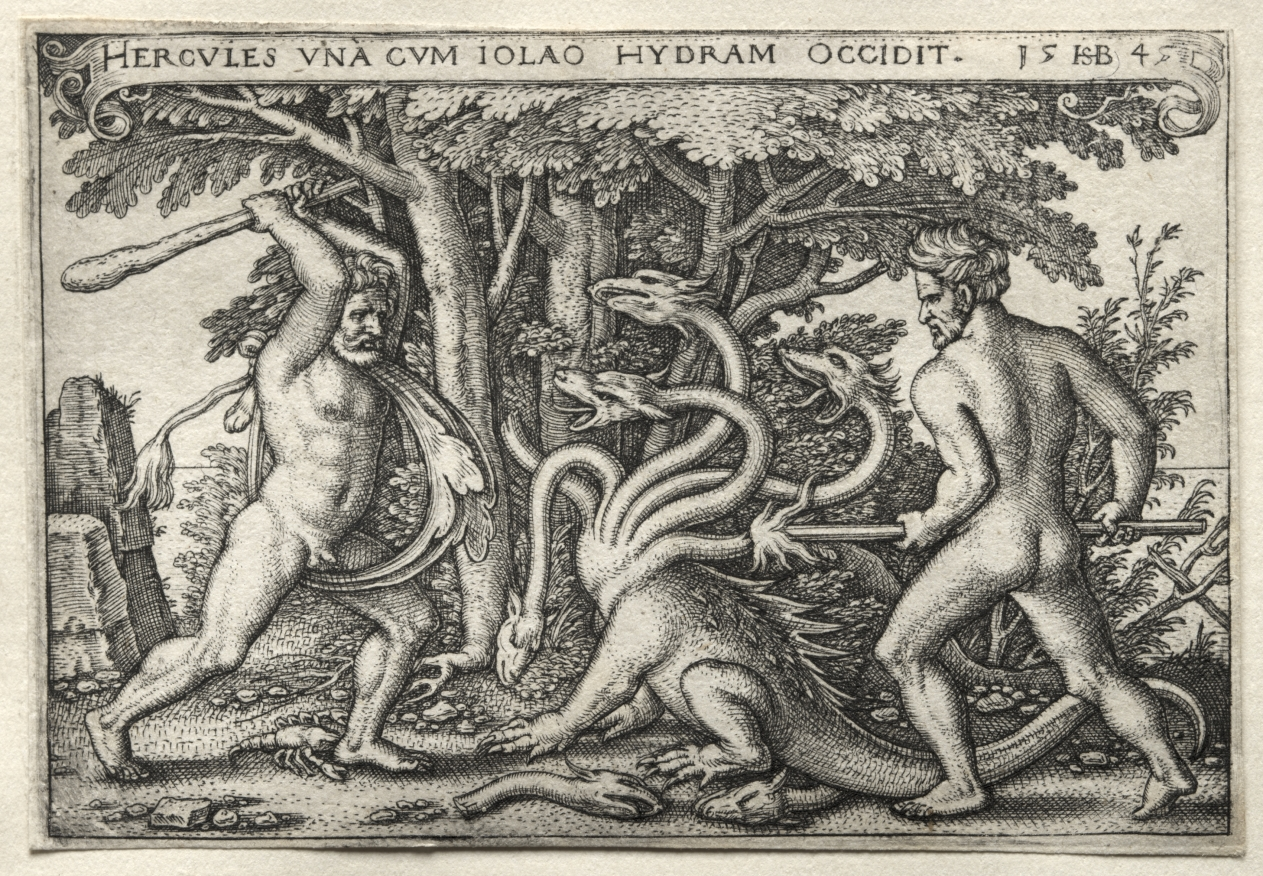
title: The Labors of Hercules: Hercules Killing the Lernean Hydra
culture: Germany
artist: Hans Sebald Beham (German, 1500–1550)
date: 1545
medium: engraving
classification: Print